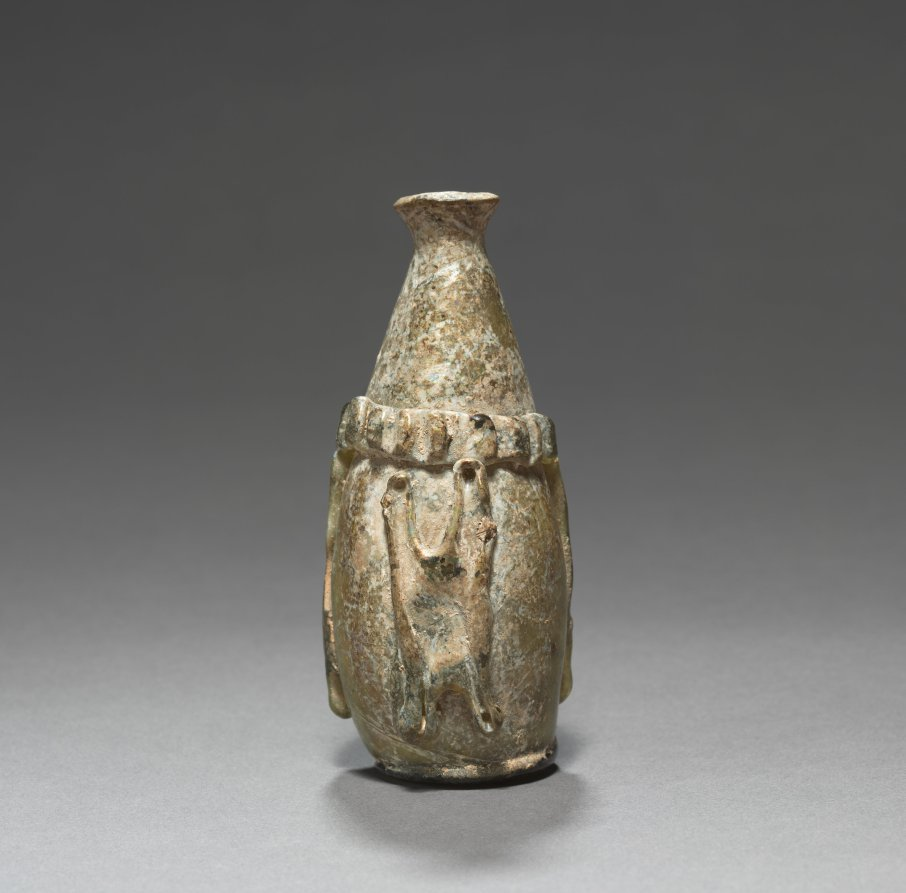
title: Bottle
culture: Early Islamic, Eastern Mediterranean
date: 600s–800s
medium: glass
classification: Glass